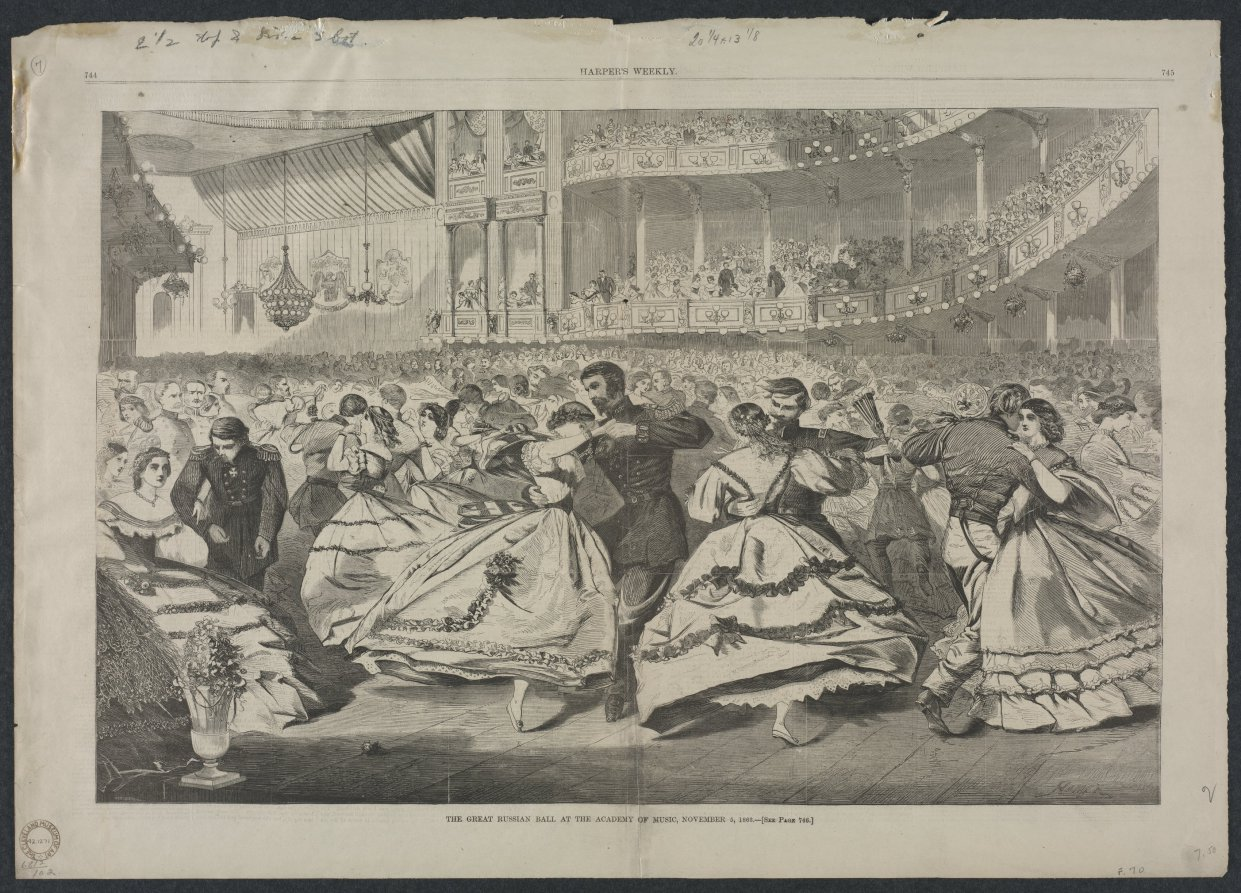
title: The Great Russian Ball at the Academy of Music, November 5, 1863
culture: America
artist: Winslow Homer (American, 1836–1910)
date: 1863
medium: wood engraving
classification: Print